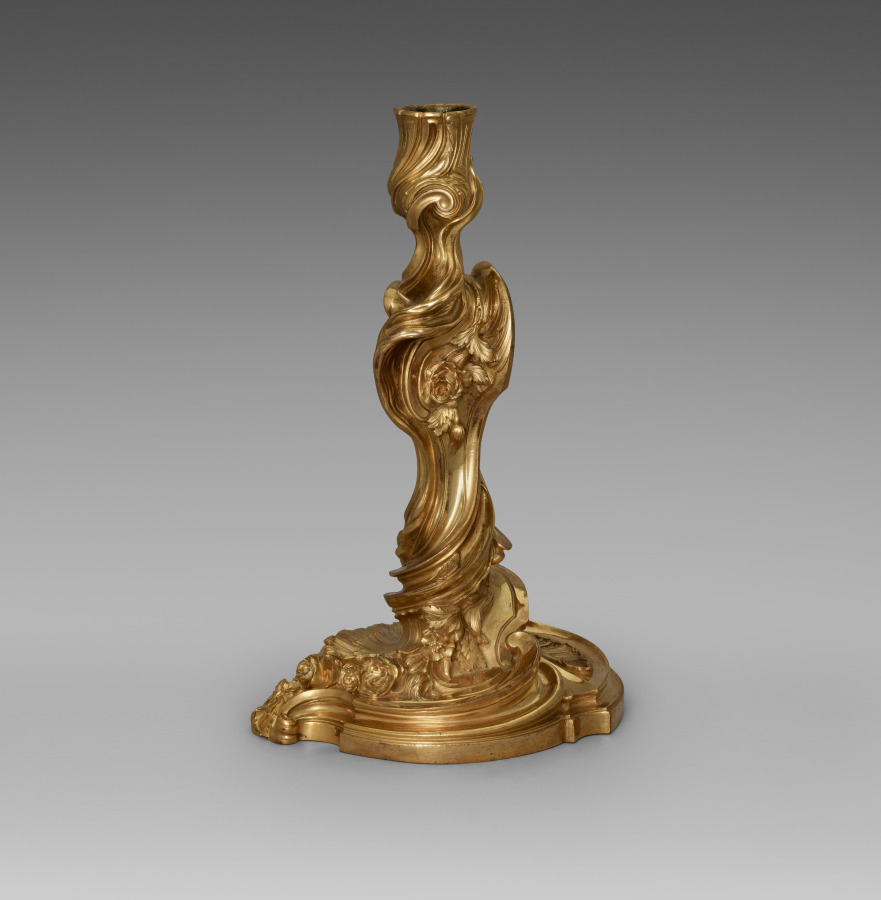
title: Candlestick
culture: France, 18th century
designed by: Juste-Aurèle Meissonnier (French, 1695–1750)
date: c. 1740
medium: gilt metal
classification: Furniture and woodwork